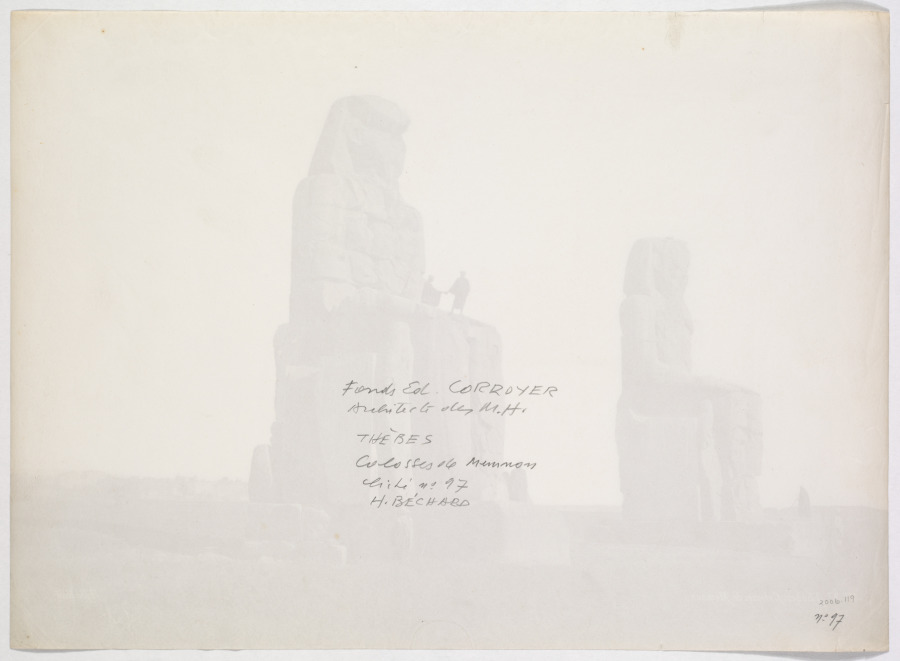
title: Thebes, The Colossi of Memnon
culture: France, 19th century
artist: Henri Béchard (French)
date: 1870s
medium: albumen print from wet collodion negative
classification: Photograph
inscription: Imprinted in white on recto: "No.97 Thebes, Colosses de Memnon H. Bechard" Written in pencil on verso: "No.97/Fiends (?) Ed. CORROYER/Drilitect (?) olly (?) M.H./THEBES/Colosses de Memnon/Li(?) No.97 H.BECHARD"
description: As more photographers shot the same monuments,depictions became formulaic.Numerous photographers produced almost identical images,as demonstrated in these two views of the Colossi of Memnon. Shot from different sides but about the same distance, both images employ an angled view and use Egyptian servants and guides as local color and indexes of scale. Captions and artists’ signatures were often written in reverse on the negatives so that they would automatically become part of each print. Sometimes, as in the Beato image, the artist or his assistant was care less.